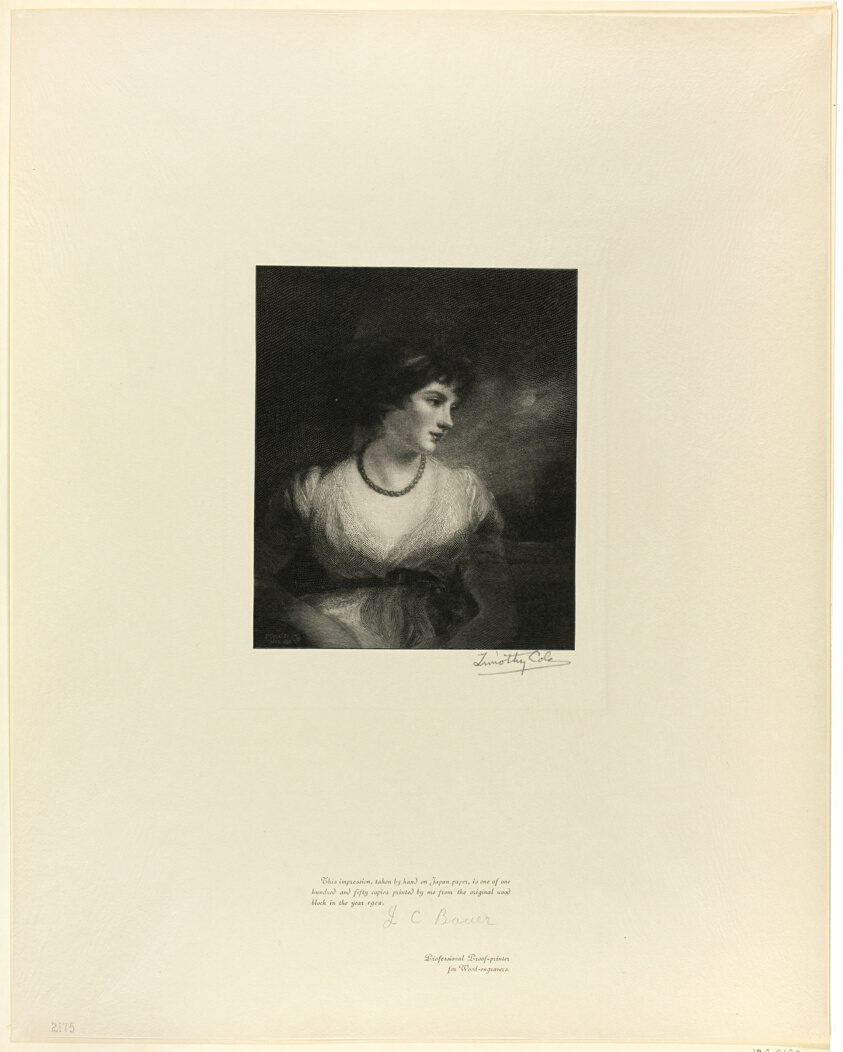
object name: Print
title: Countess of Oxford, from Old English Masters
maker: Timothy Cole (American, born England, 1852-1931); after John Hoppner (English, 1758-1810)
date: 1898, printed 1902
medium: Wood engraving on chine paper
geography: United States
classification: wood engraving; print; prints and drawing